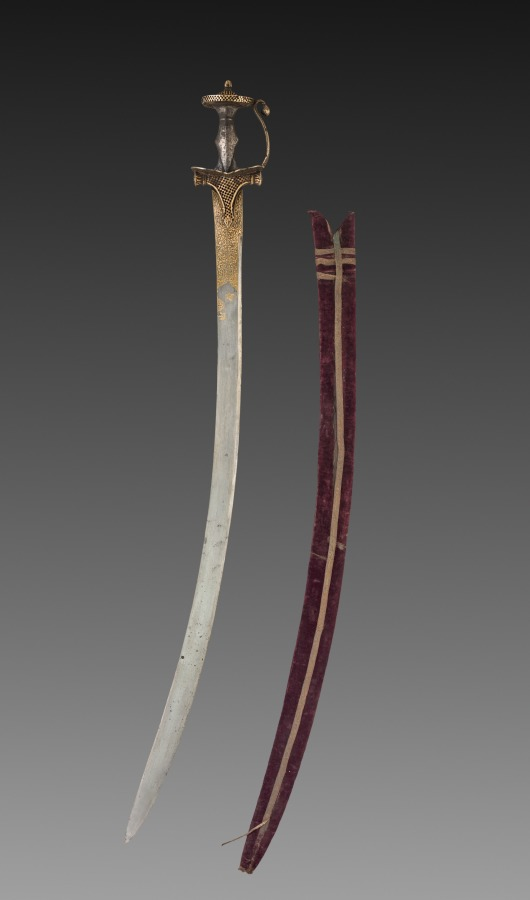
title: Tulwar sword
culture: India, probably Deccan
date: 1700s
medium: Iron hilt with gold; steel blade with gold; wood scabbard with velvet and metallic thread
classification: Arms and Armor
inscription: Help [comes] from God, and Victory is imminent.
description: This long curved sword and scabbard are of the kind used and worn by Mughal nobility, as seen often in paintings. The openwork hilt is a characteristic of swords from the southern Indian region known as the Deccan. By the end of the 1500s, the Mughals began making regular incursions into the Deccan as they attempted to expand their empire, increasing the exchange of art forms. Repeated four times, twice on one side of the blade and twice on the other in gold inlay, is the same line from the Qur'an 61:13: “Help [comes] from God, and Victory is imminent.” This is a popular inscription on daggers, banners, and other instruments of war, as it reassures the combatants that God is on their side, and therefore they can in good faith expect a speedy victory if they fight valiantly.